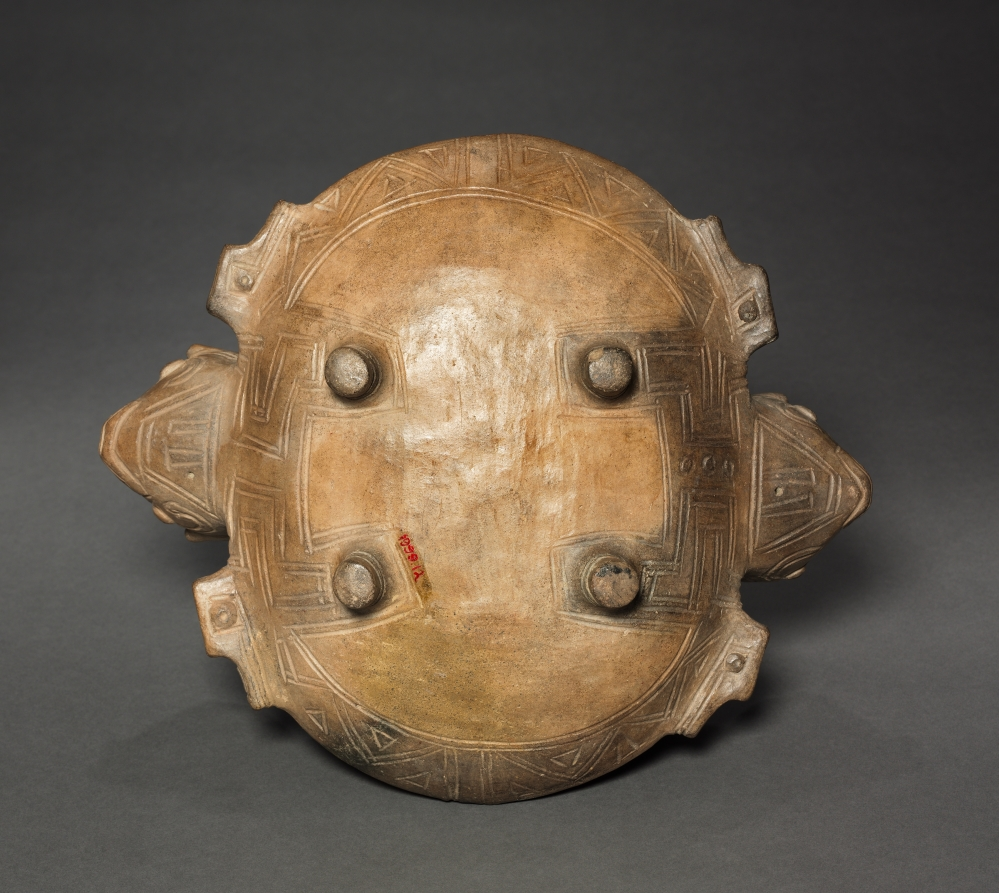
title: Double-Bat Bowl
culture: Colombia, Tairona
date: c. 900–1550 (thermoluminescence date, 810–1310)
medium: earthenware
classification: Ceramic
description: The archaeological Tairona civilization of mountainous northern Colombia is believed to be ancestral to the contemporary Kogi indigenous group. Ancient Tairona sites are terraced, and characterized by circular stone building foundations. The most famous form of Tairona art is gold jewelry, especially lost-wax cast figurines of chiefs, and anthropomorphic bats and birds. Tairona ceramics are less well known. This bowl has two protruding bat heads and four legs. The incurved sides of the bowl to either side of each head represents the bats' wings. The vessel's surface is decorated with raised serpents, as well as incised and impressed patterns.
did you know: The Tairona civilization lived in the mountains of northern Colombia.